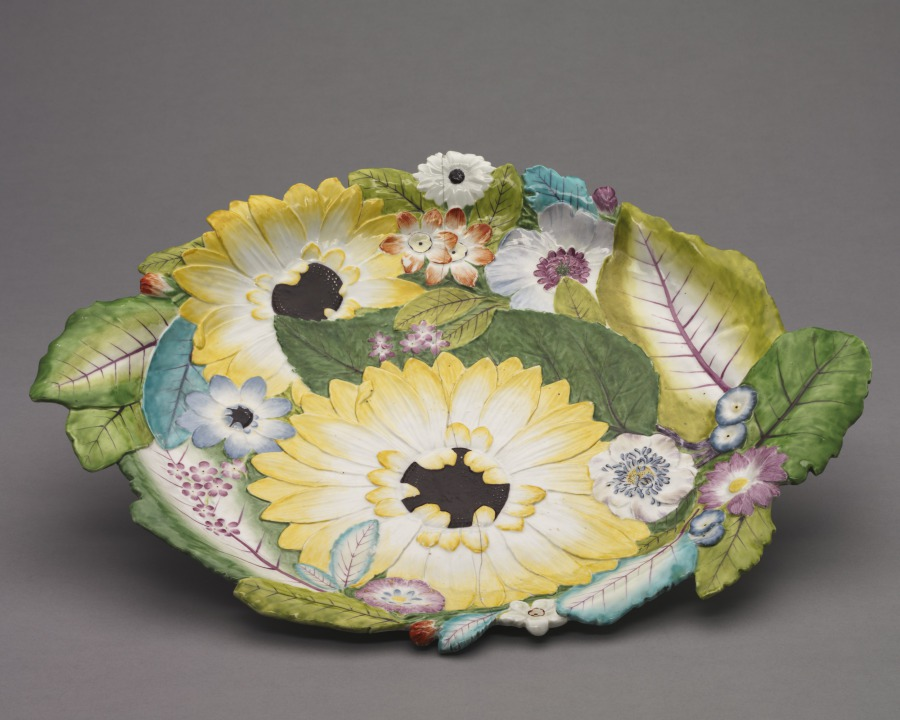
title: Stand for a Hen and Chicks Tureen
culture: England, London, Chelsea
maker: Chelsea Porcelain Factory (Britain, London, 1745–84)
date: c. 1755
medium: soft-paste porcelain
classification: Ceramic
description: The ceramic factory at Chelsea, located along the river Thames in western London, was Britain’s most renowned factory of decorative porcelain in the mid-1700s. Large tureens in the form of chickens or rabbits appealed to wealthy aristocrats, who took great care in developing specimen animal and poultry breeds on their country estates. The design for this particular tureen was taken from a popular seventeenth-century print by Francis Barlow depicting a farmyard.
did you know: See cover record for Hen and Chicks Covered Tureen (1984.58).